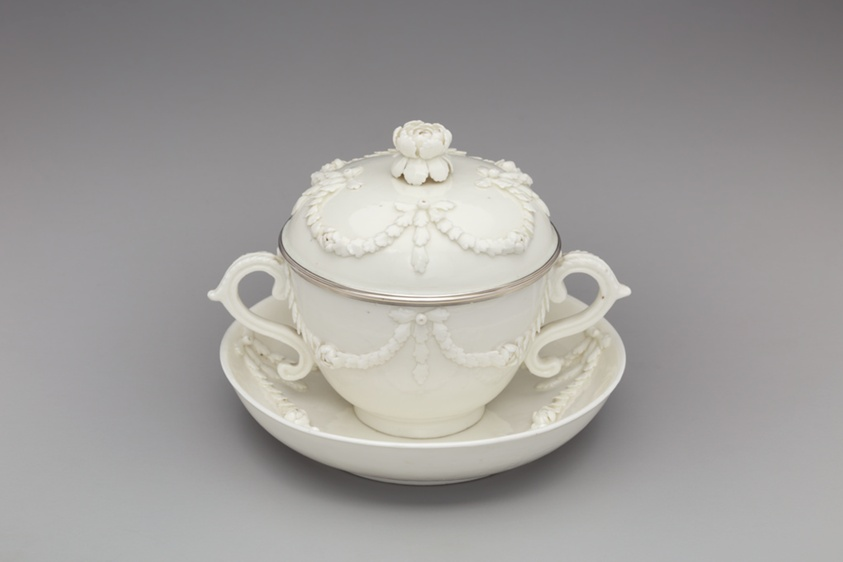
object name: Ceramics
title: Covered Bowl and Stand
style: Neoclassicism, 18th Century, Classical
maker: Mennecy Factory (France, 1750-73)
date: c. 1750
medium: Soft-paste porcelain and silver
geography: Mennecy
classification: mennecy; blanc de Chine; european decorative arts; porcelain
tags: sugar, sugar bowl, tea, tea service